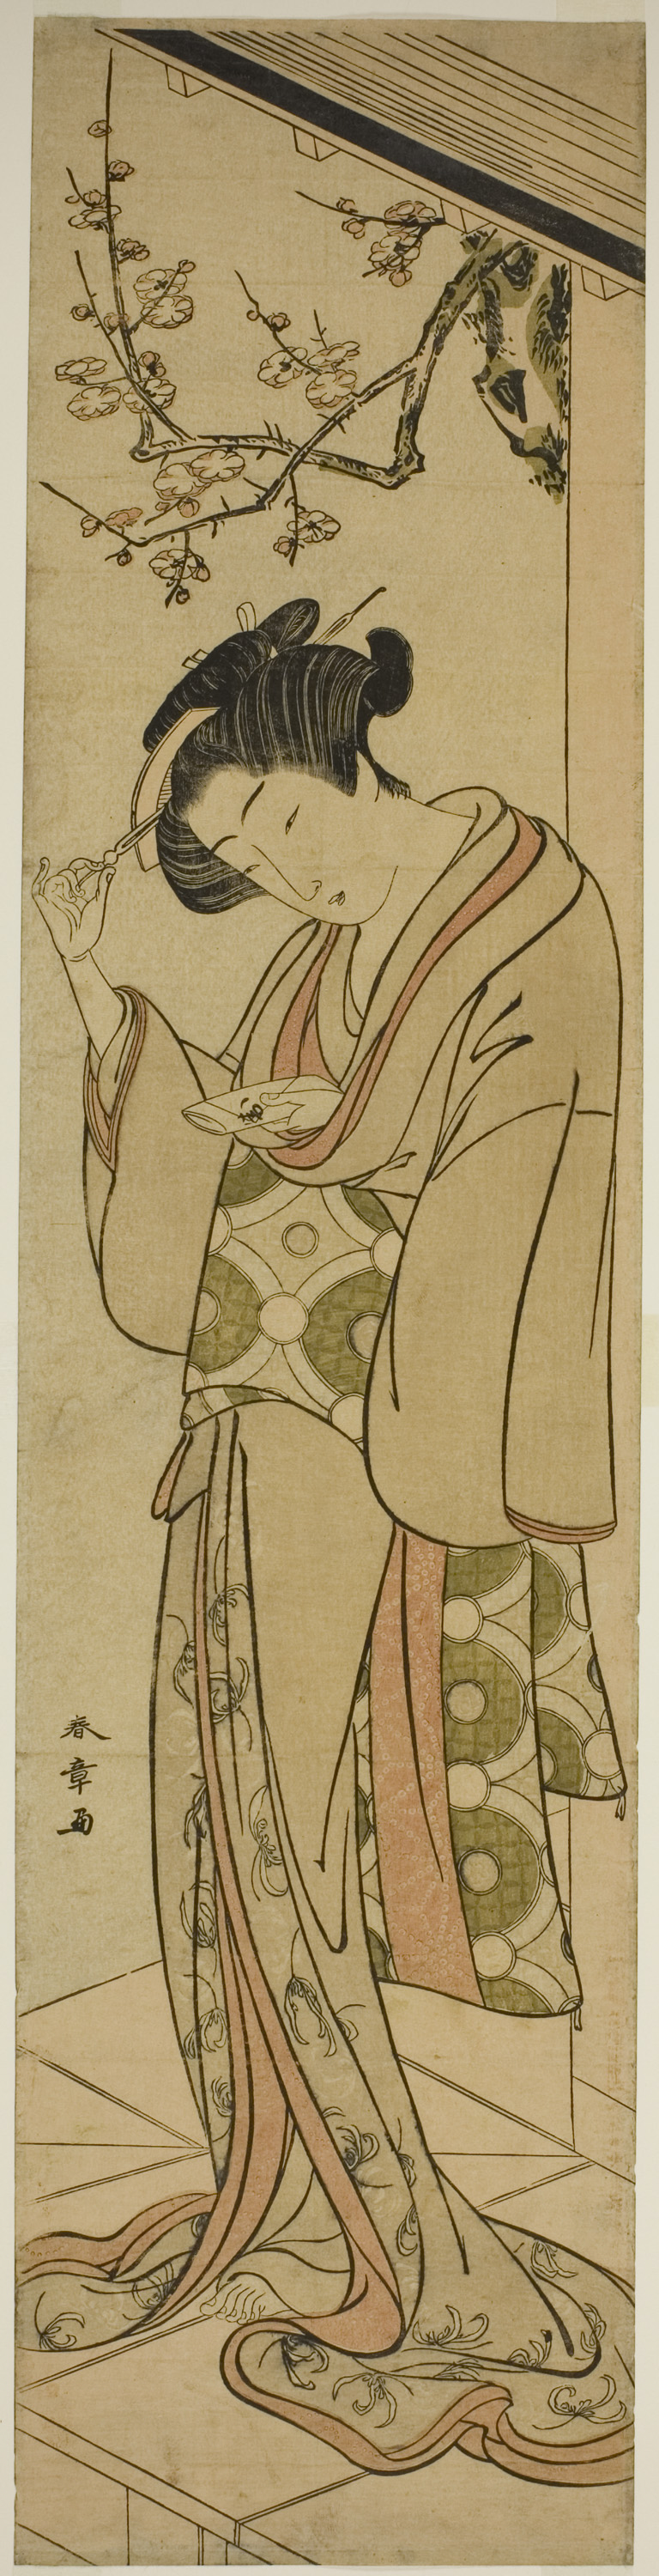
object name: Print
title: Woman on a Veranda About to Open a Love-letter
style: Japanese (culture or style)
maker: Katsukawa Shunsho 勝川 春章; Japanese, 1726-1792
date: mid–late 1770s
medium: Color woodblock print; wide hashira-e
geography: Japan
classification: woodblock print; print; asian art